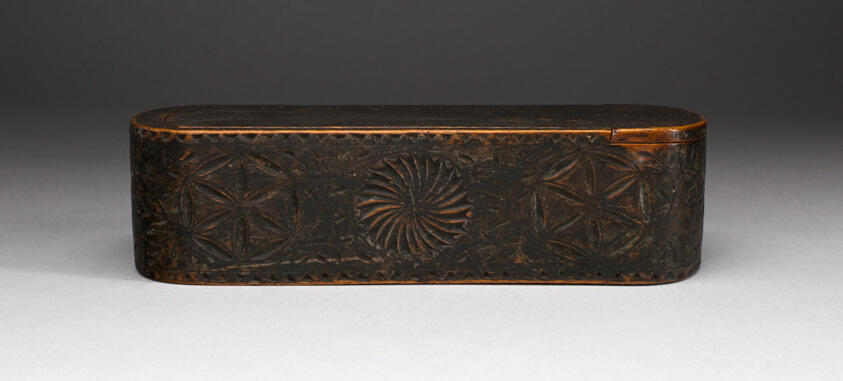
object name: Decorative Arts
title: Box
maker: Artist unknown (American, 18th–19th century)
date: 1750–1850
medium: Walnut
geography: United States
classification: case furniture; box; furniture; american decorative arts; american arts; decorative arts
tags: furniture